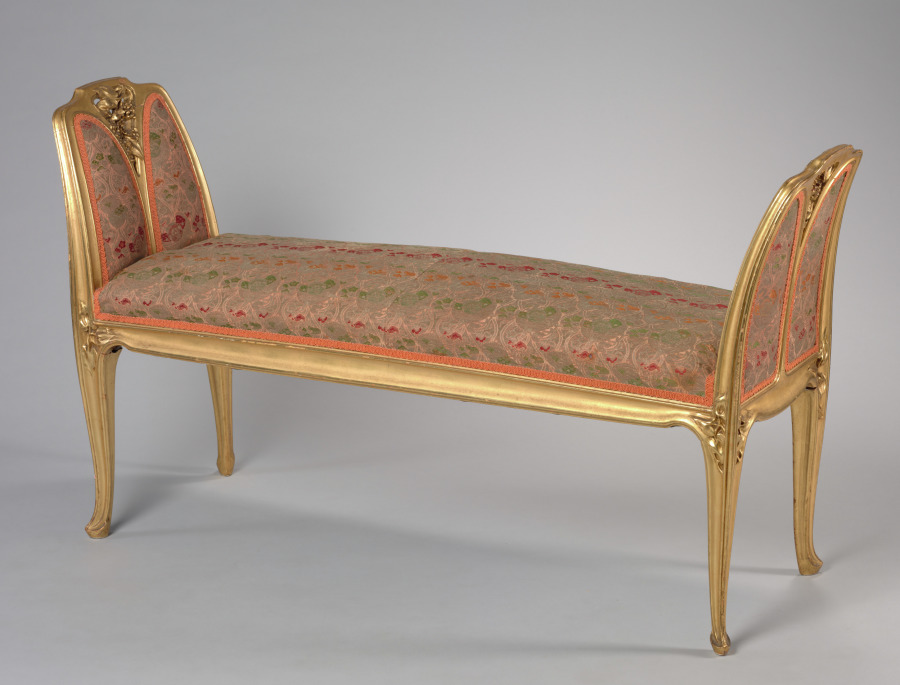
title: Bench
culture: France, Nancy, late 19th-early 20th Century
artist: attributed to Louis Majorelle (French, 1859–1926)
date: c. 1900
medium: gilt wood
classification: Furniture and woodwork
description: In the 20th century, designers of French furniture in the Art Nouveau style began to take inspiration from Rococo pieces of around 1750. With its gently curving forms, this bench exhibits the Majorelle firm's version of this refined taste. It is presently covered with a Japanese brocade of about 1900.